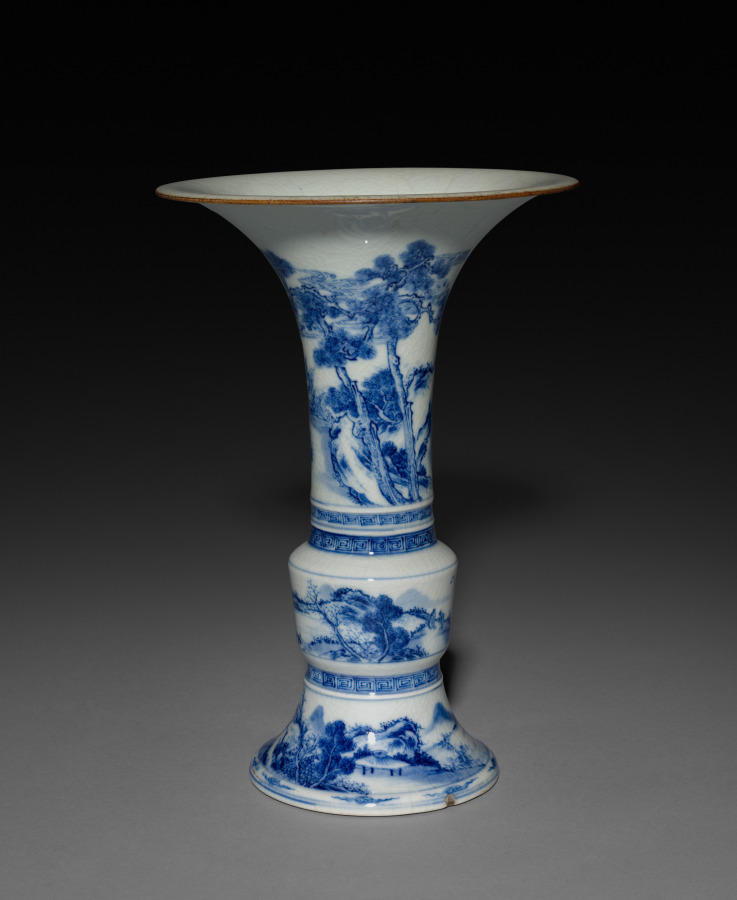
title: Beaker Vase in Form of Archaic Gu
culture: China, Jiangxi province, Jingdezhen kilns, Qing dynasty (1644-1911), Yongzheng reign (1723-35)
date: 1723–35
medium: porcelain with underglaze blue decoration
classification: Ceramic